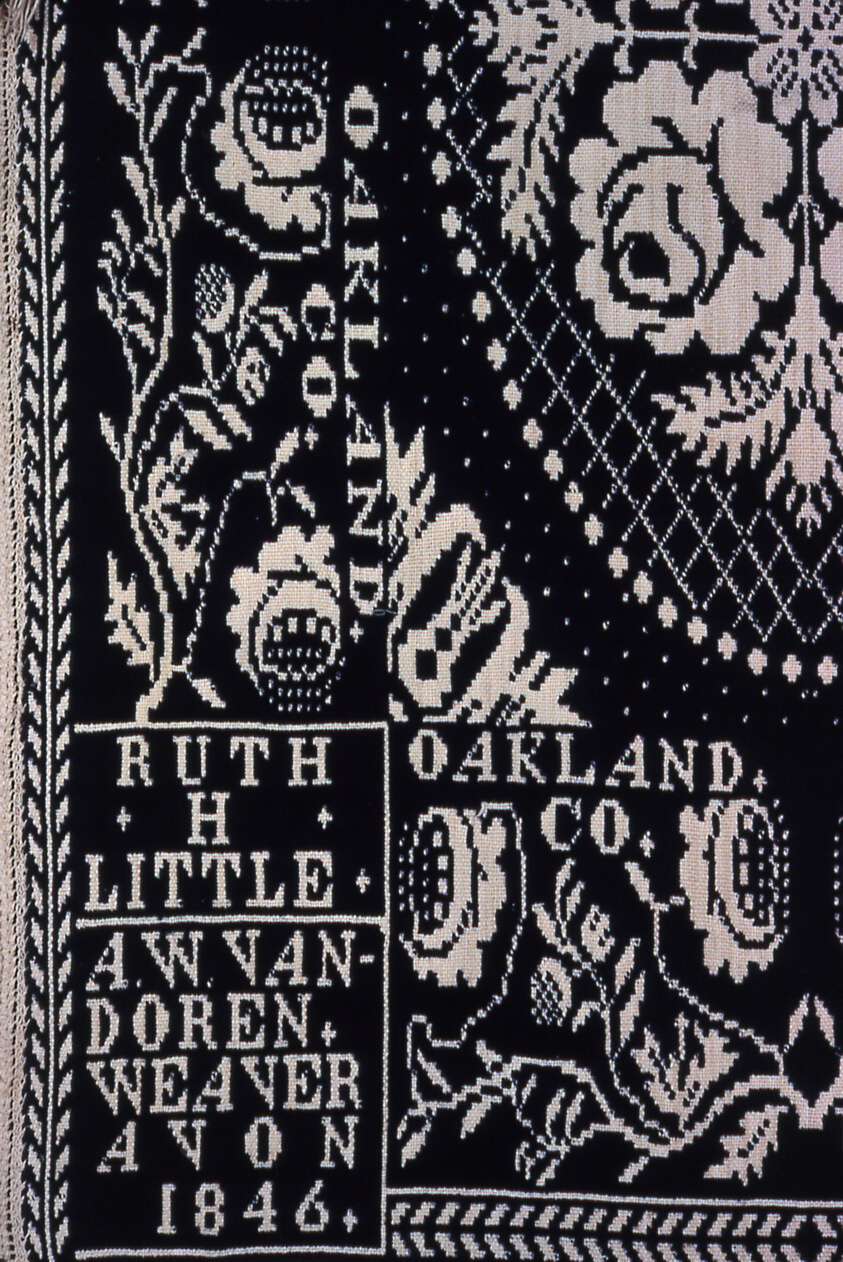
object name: Textile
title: Coverlet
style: 19th century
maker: Abram William Van Doren (American, 1808-1884); Michigan, Oakland County, Avon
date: 1846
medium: Cotton and wool, plain weave double cloth; woven on loom with Jacquard attachment; cotton, machine-knit fringe; two loom widths joined; all selvages present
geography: United States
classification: weaving - coverlet; coverlet; weaving; textile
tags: medallions, vines, flowers, roses, coverlet